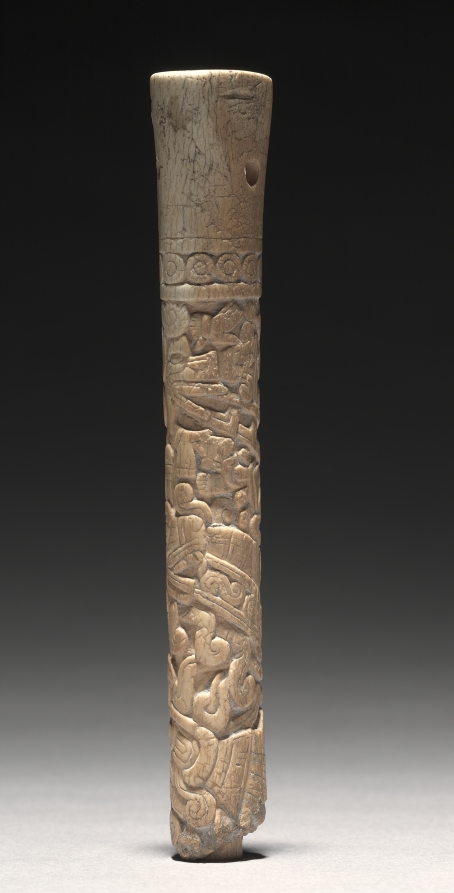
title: Carved Tube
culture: Mexico, Oaxaca, Mixtec, 13th-16th century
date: c. 1200–1519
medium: bone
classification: Jewelry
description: Carved in spiral registers, the ornamentation on this bone tube resembles Mixtec painting, both in codices (screenfold books) and architectural murals.